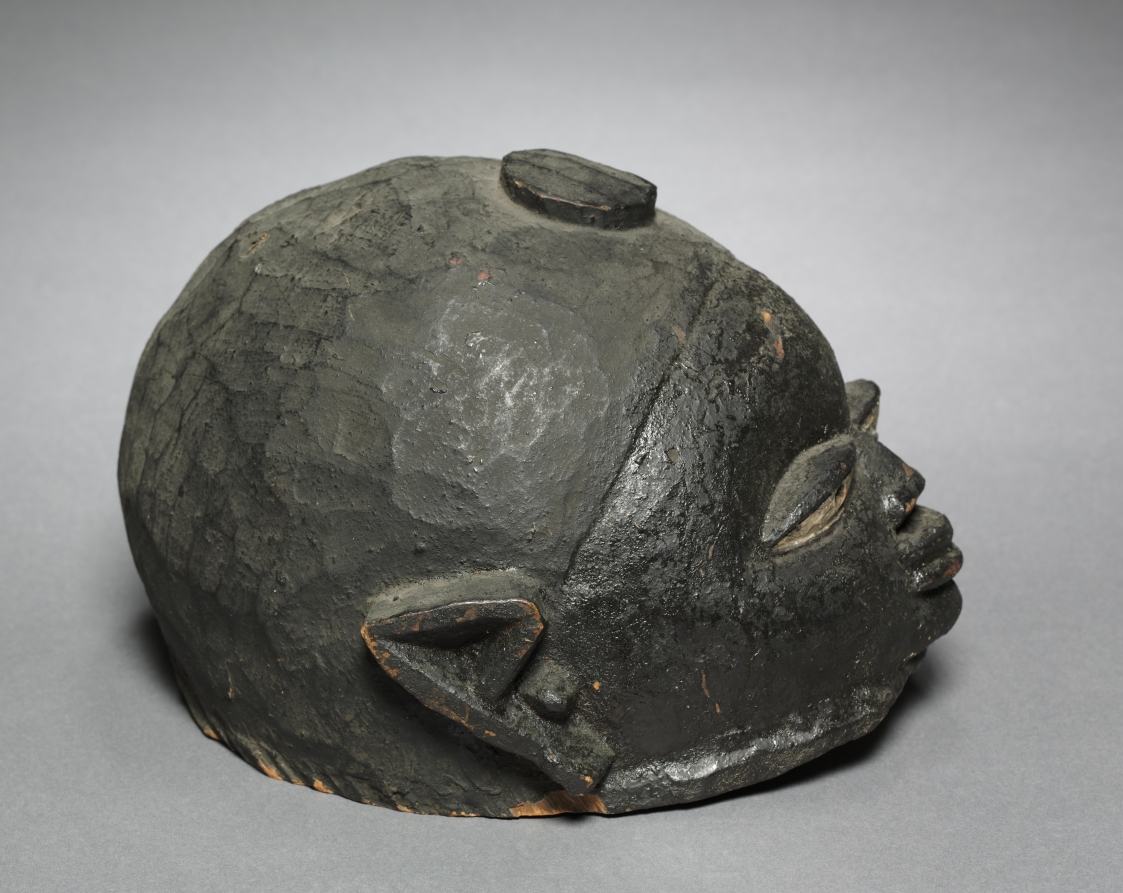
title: Mask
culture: Africa, West Africa, Nigeria, Yorùbá-style maker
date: c. 1910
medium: Wood and paint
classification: Mask